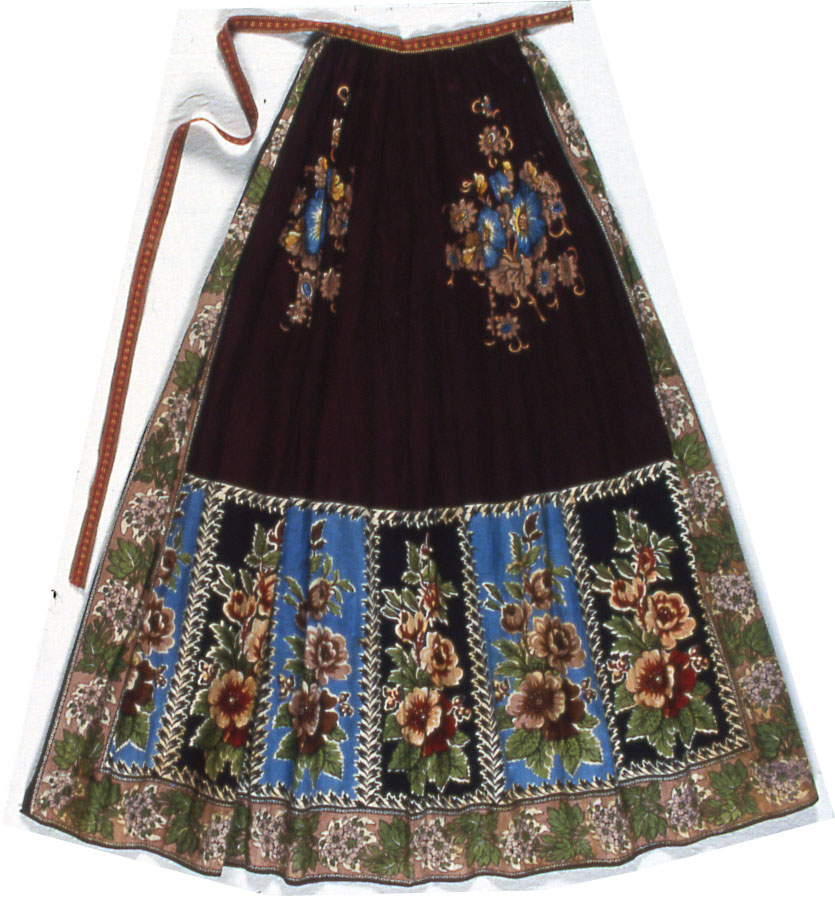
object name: Costume and Accessories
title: Apron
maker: Switzerland, Zug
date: 1800/25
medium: Cotton, plain weave; roller printed; two selvages present; ribbon ties: cotton, plain weave with supplementary patterning warps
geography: Switzerland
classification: textile; weaving - printed; costume